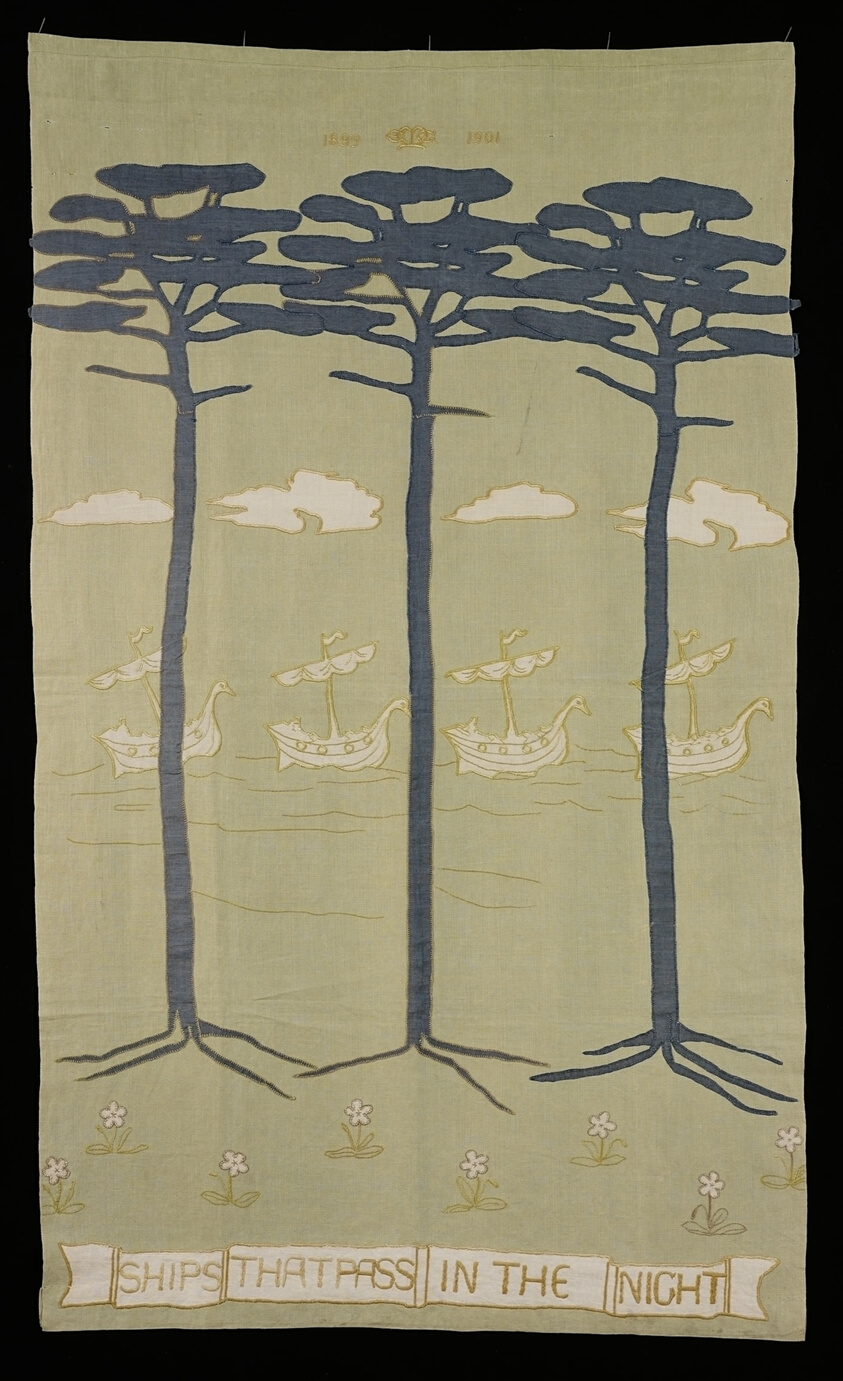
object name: Textile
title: Hanging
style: Arts and Crafts Movement, british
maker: Probably designed by the Haslemere Peasant Industries; England, Surrey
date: 1899/1901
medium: Linen, plain weave; appliquéd with linen, plain weave; embroidered with cotton in stem, buttonhole, and satin stitches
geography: England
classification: textile; needlework (visual works)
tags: trees